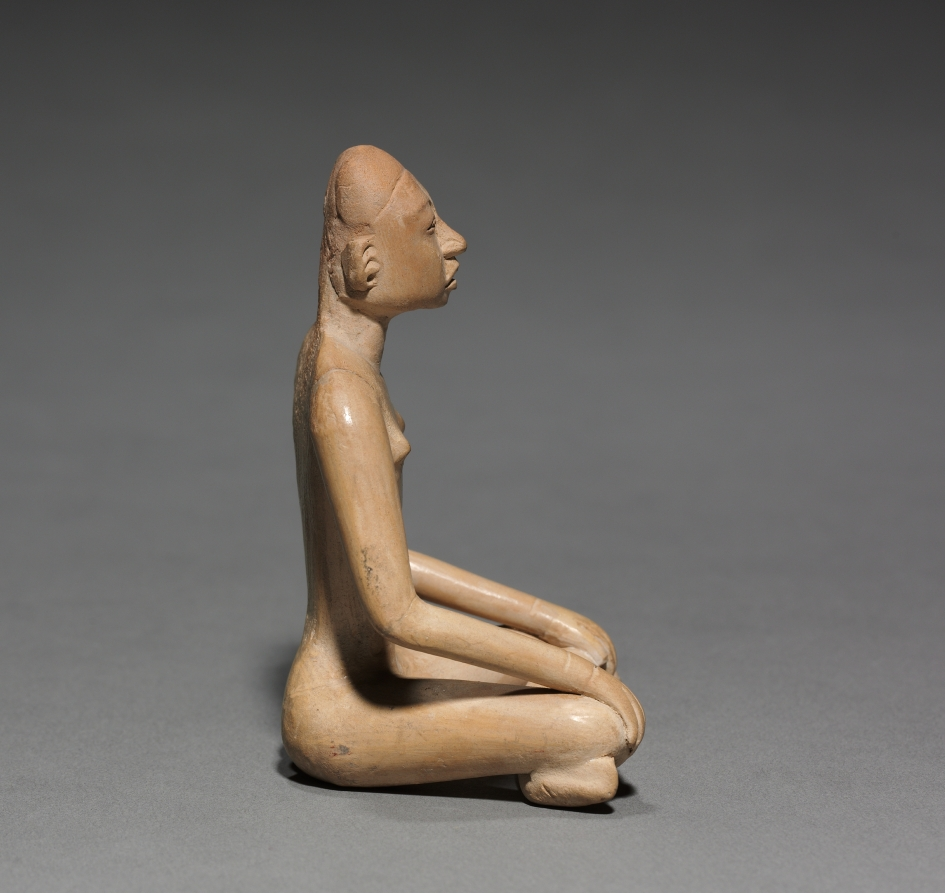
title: Seated Figurine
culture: Mexico, Gulf Coast, Huastec, Pánuco style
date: 1–700 CE (thermoluminescence date, 225–1055 CE)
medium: earthenware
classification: Sculpture